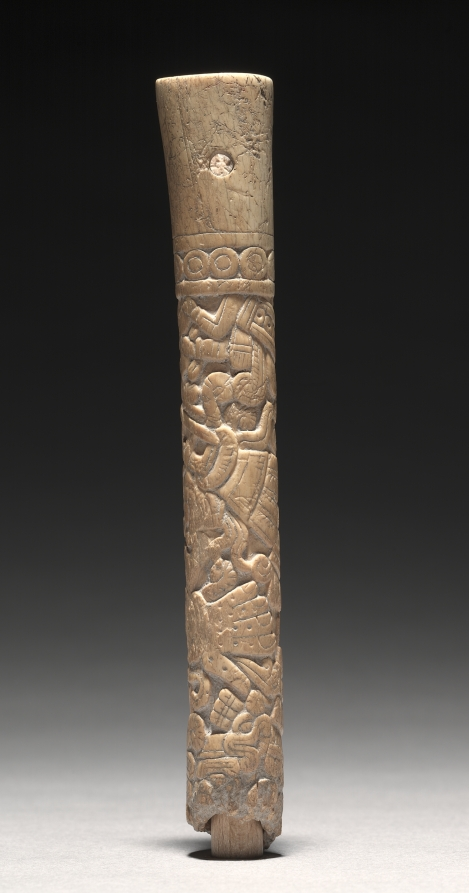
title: Carved Tube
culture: Mexico, Oaxaca, Mixtec, 13th-16th century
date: c. 1200–1519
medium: bone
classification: Jewelry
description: Carved in spiral registers, the ornamentation on this bone tube resembles Mixtec painting, both in codices (screenfold books) and architectural murals.